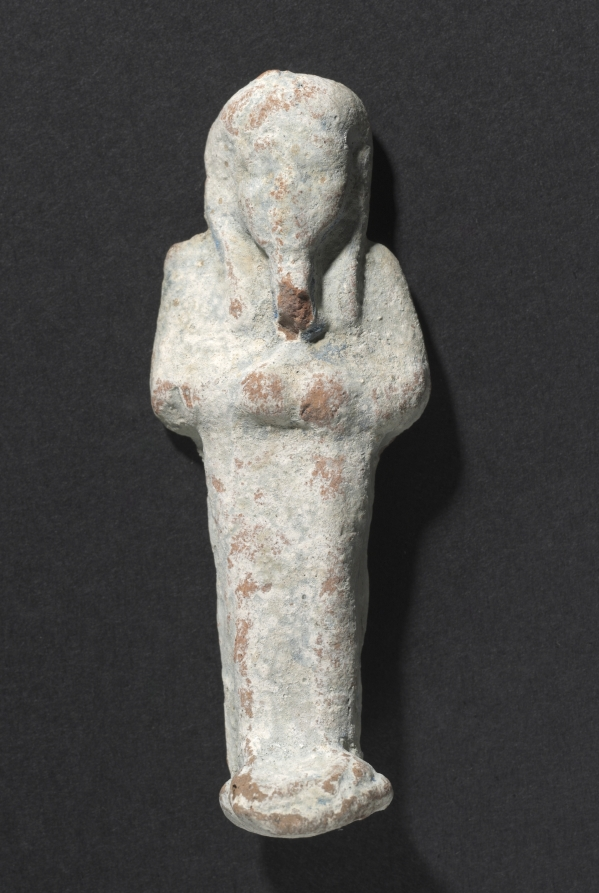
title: Shawabty of Ditamenpaankh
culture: Egypt, Late period (715–332 BCE), Dynasty 25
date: 715–656 BCE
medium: terracotta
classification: Funerary Equipment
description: High demand for shawabtys in the Late Period, a time when as many as 400 or more shawabtys were placed in the tomb with the deceased, gave rise to a specialized container for storing them: the shawabty box. This example is inscribed for the lady of the house, Ditamenpaankh, and was probably one of a pair originally made for her. The single-masted boat on the box's lid is perhaps an allusion to the pilgrimage of the deceased to the holy city of Abydos, the cult city of Osiris, king of the dead. The shawabtys inside are crude, mass-produced examples cast in an open mold. Made of terracotta, their blue paint imitates more costly shawabtys made of faience. As for the shawabty spell, it has been removed from its traditional location on the shawabty's front and relocated onto the sides of box, where it needed only to be written once, thus expediting production.